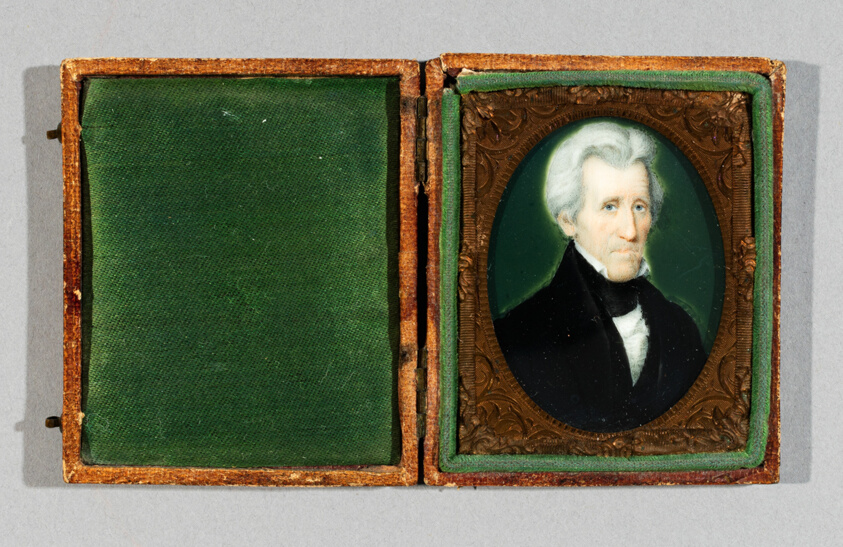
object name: Miniature Painting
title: General Andrew Jackson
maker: Copy after Miner Kilbourne Kellogg; American, 1814–1889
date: c. 1840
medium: Watercolor on ivory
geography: United States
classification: miniature painting; american arts; miniature; painting